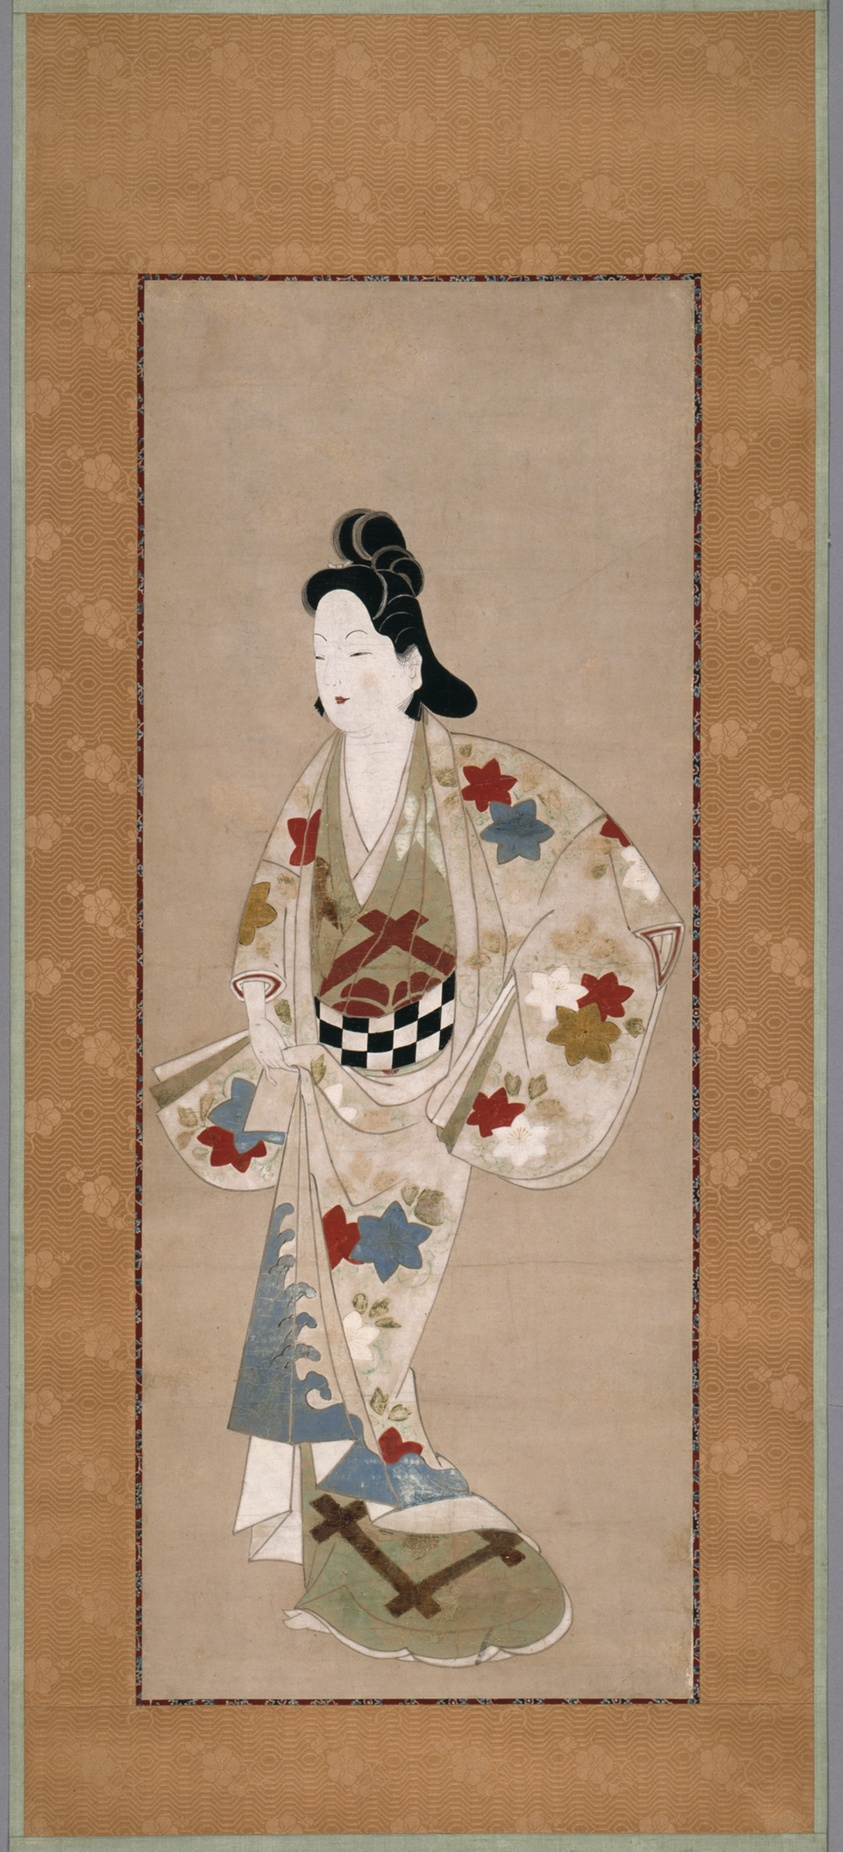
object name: Painting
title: Standing Beauty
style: Japanese (culture or style)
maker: Artist unknown; Japanese, active 17th century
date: 1661/73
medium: Hanging scroll; ink, color, and gold on paper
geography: Japan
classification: hanging scroll; painting; asian art